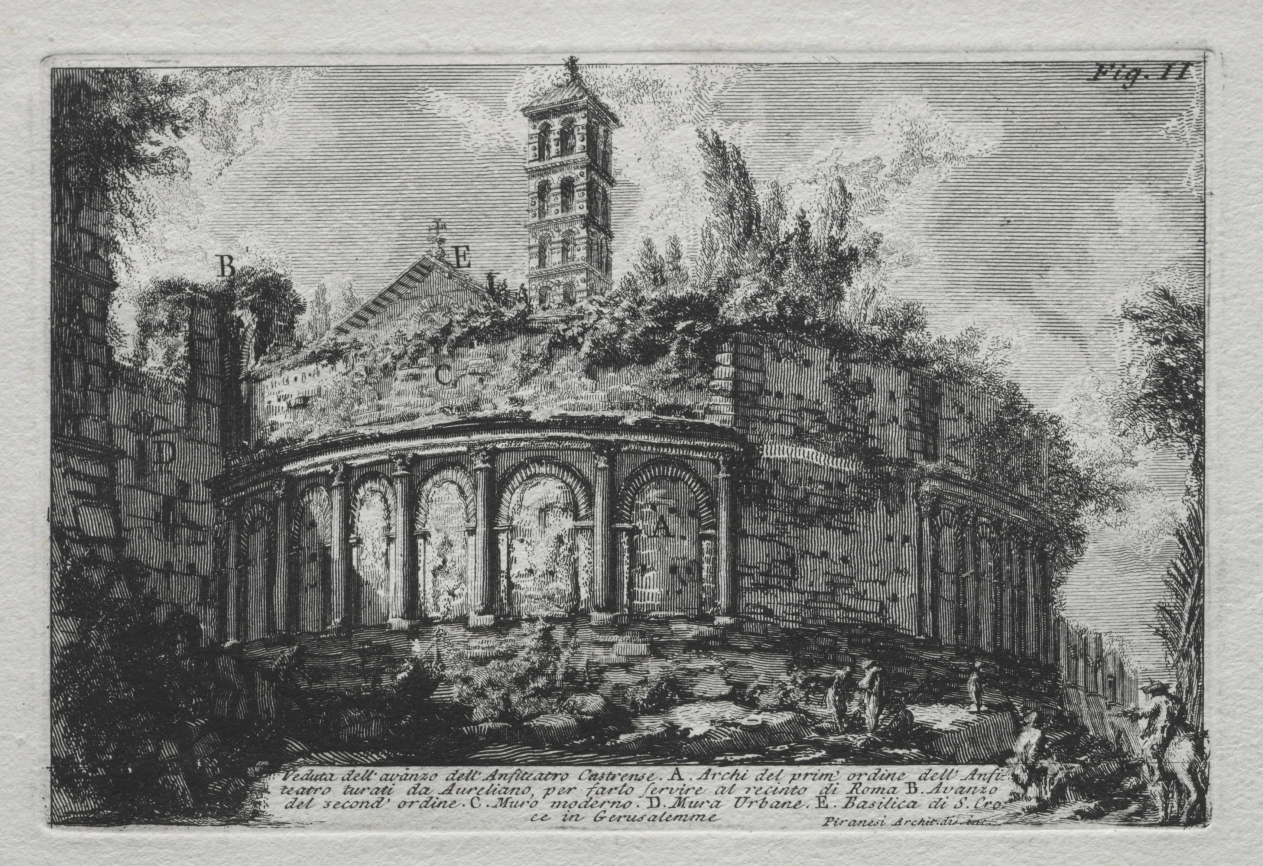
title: Veduta dell'avanzo dell'Anfiteatro Castranse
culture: Italy, 18th century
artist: Giovanni Battista Piranesi (Italian, 1720–1778)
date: 1750s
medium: etching and engraving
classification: Print